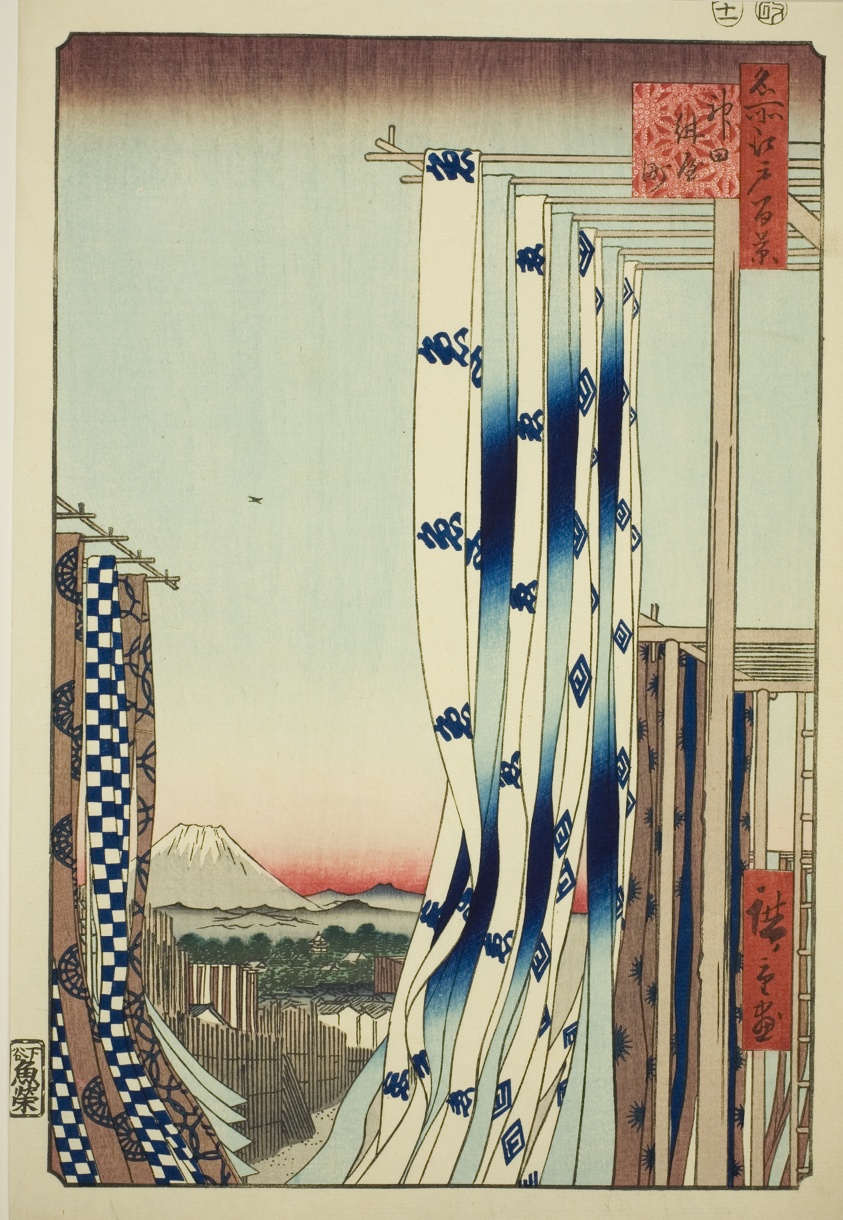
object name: Print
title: The Dyers' Quarter in Kanda (Kanda Kon'ya-cho), from the series "One Hundred Famous Views of Edo (Meisho Edo hyakkei)"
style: Japanese (culture or style)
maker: Utagawa Hiroshige 歌川 広重; Japanese, 1797-1858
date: 1857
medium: Color woodblock print; oban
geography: Japan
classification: woodblock print; print; asian art